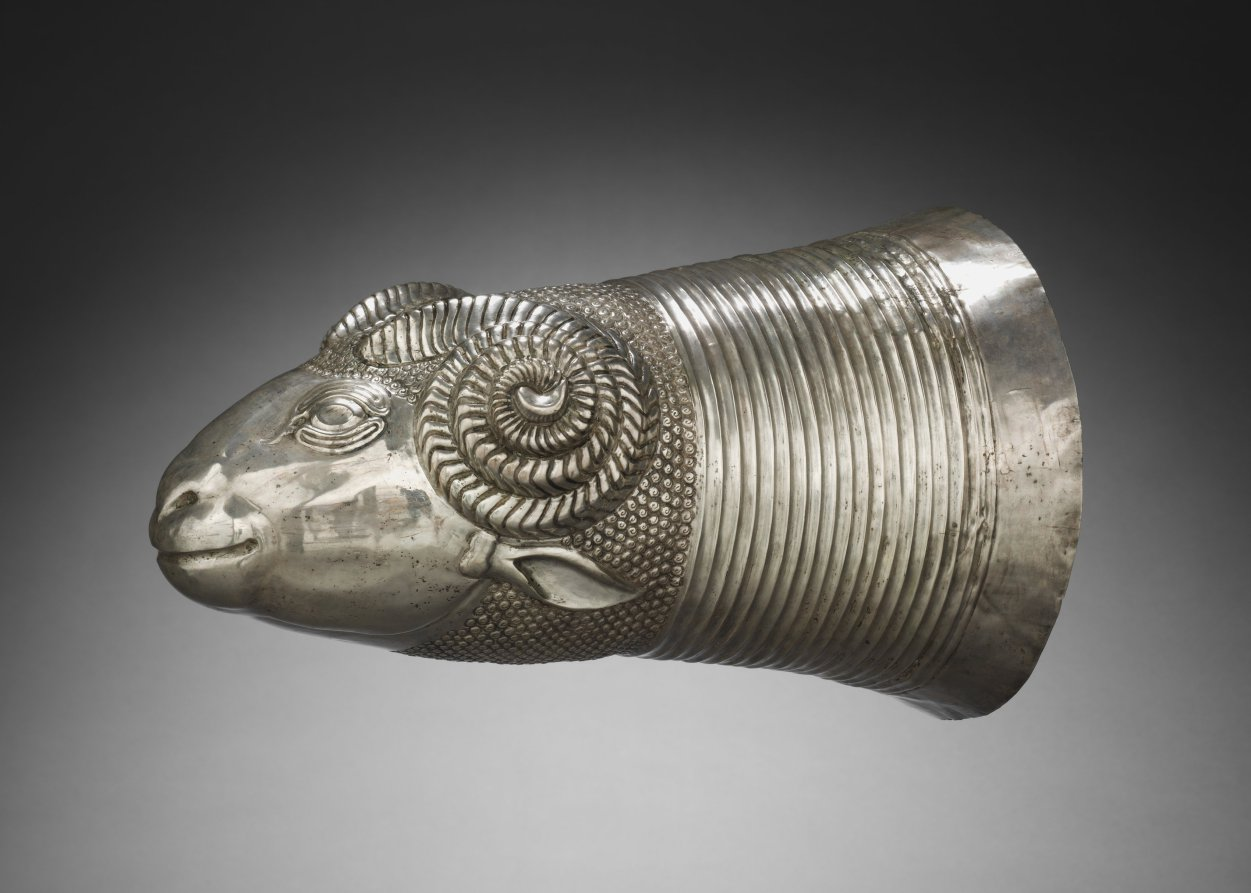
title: Ram-Head Drinking Vessel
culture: Iran, Median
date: c. 600 BCE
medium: silver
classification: Metalwork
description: The Medes, who conquered the Assyrians, were soon conquered by the Achaemenian Cyrus the Great, king of Persia from 559 to 529 BC. The rhyton, or horn-shaped drinking vessel, popular among the Medes, was adopted by the Achaemenians.